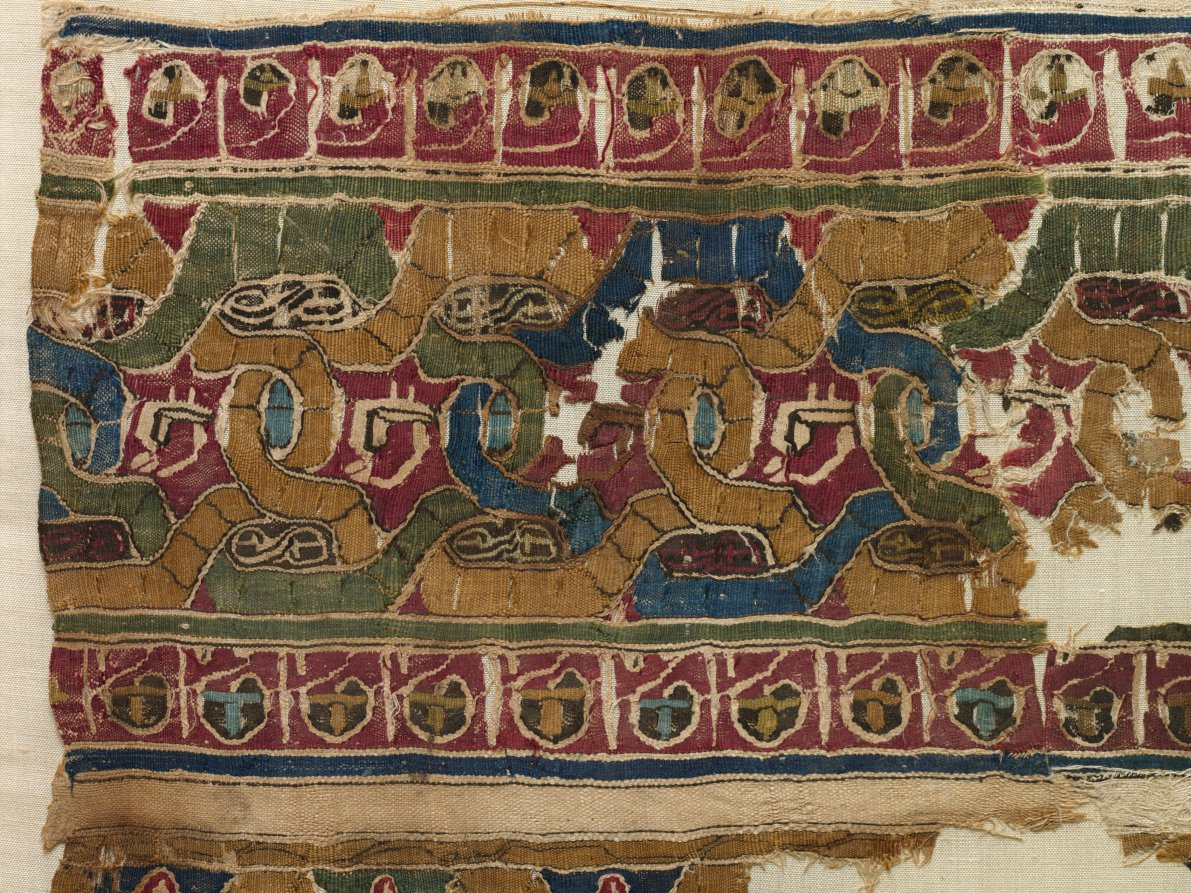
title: Tiraz with guilloche bands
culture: Egypt, Fatimid period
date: 1075–1125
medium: plain weave with inwoven tapestry weave: linen and silk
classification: Textile